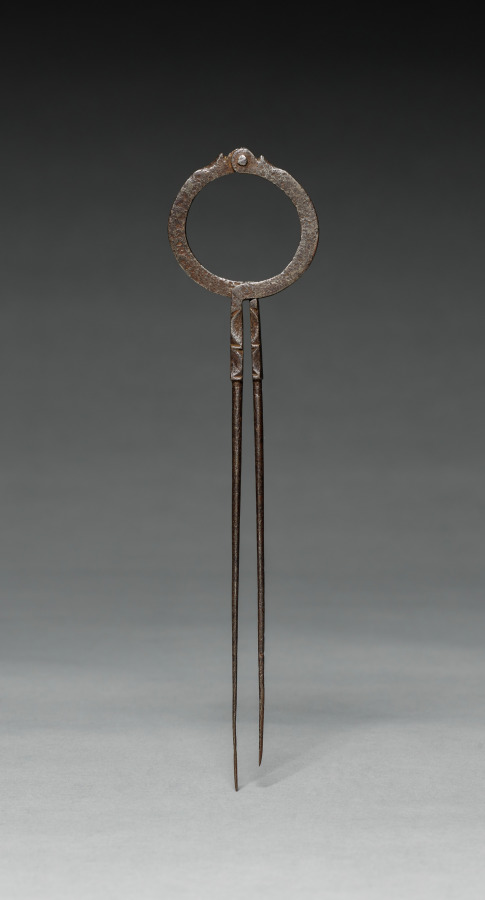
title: Dividers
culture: Europe, 17th century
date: 1600s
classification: Tool